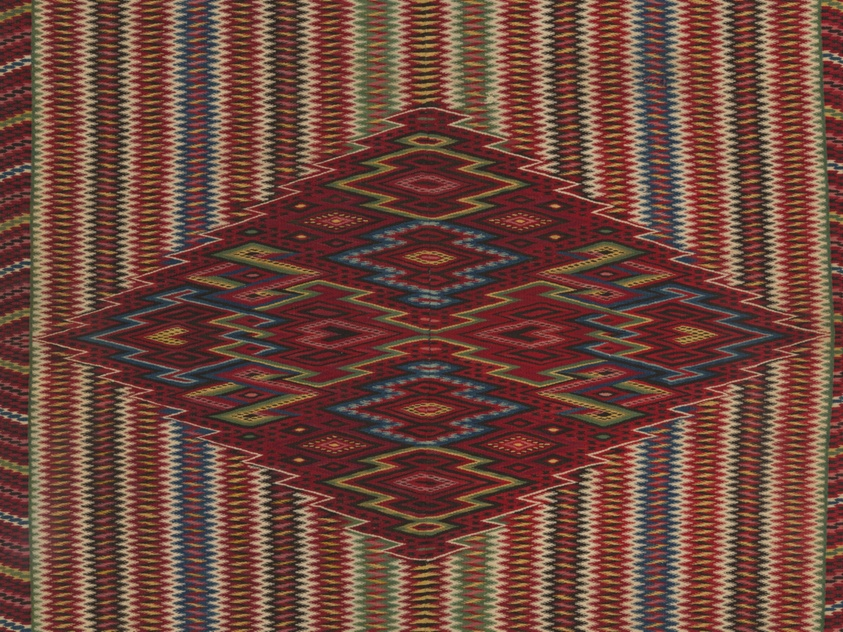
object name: Textile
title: Man's Sarape (Wearing Blanket)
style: Folk Art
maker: Saltillo, Coahuila, Mexico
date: 1800–50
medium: Cotton and wool, slit and single dovetail tapestry weave; edged with cotton, knotted fringe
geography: Saltillo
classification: textile; weaving; garment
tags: stripes, diamond shapes, diagonals, zigzags